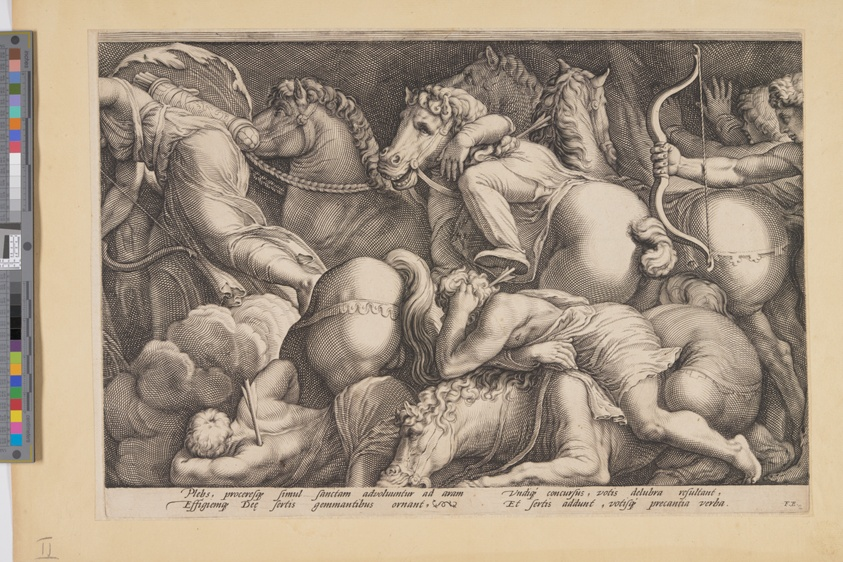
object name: Print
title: The Punishment of Niobe (Plate 2)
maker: Jan Saenredam (Dutch, 1565–1607); after Polidoro da Caravaggio (Italian, c. 1499–c. 1543)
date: 1594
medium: Engraving on ivory laid paper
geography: Netherlands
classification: print; paper; prints and drawing; engraving